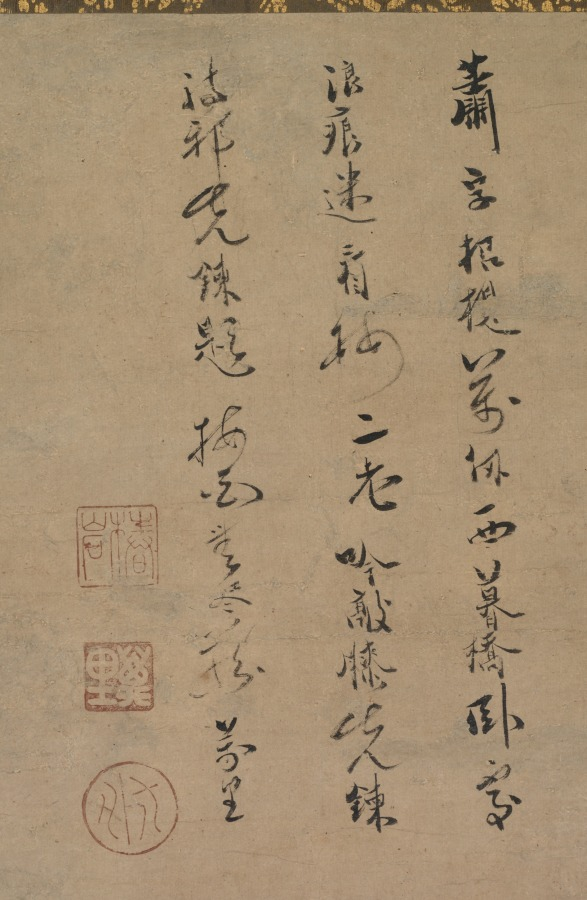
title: Lonely Temple and Towering Cliff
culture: Japan, Muromachi period (1392–1573)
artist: circle of Kenkō Shōkei (Japanese, active 1478–1506)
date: c. 1480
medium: hanging scroll; ink and slight color on paper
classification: Painting